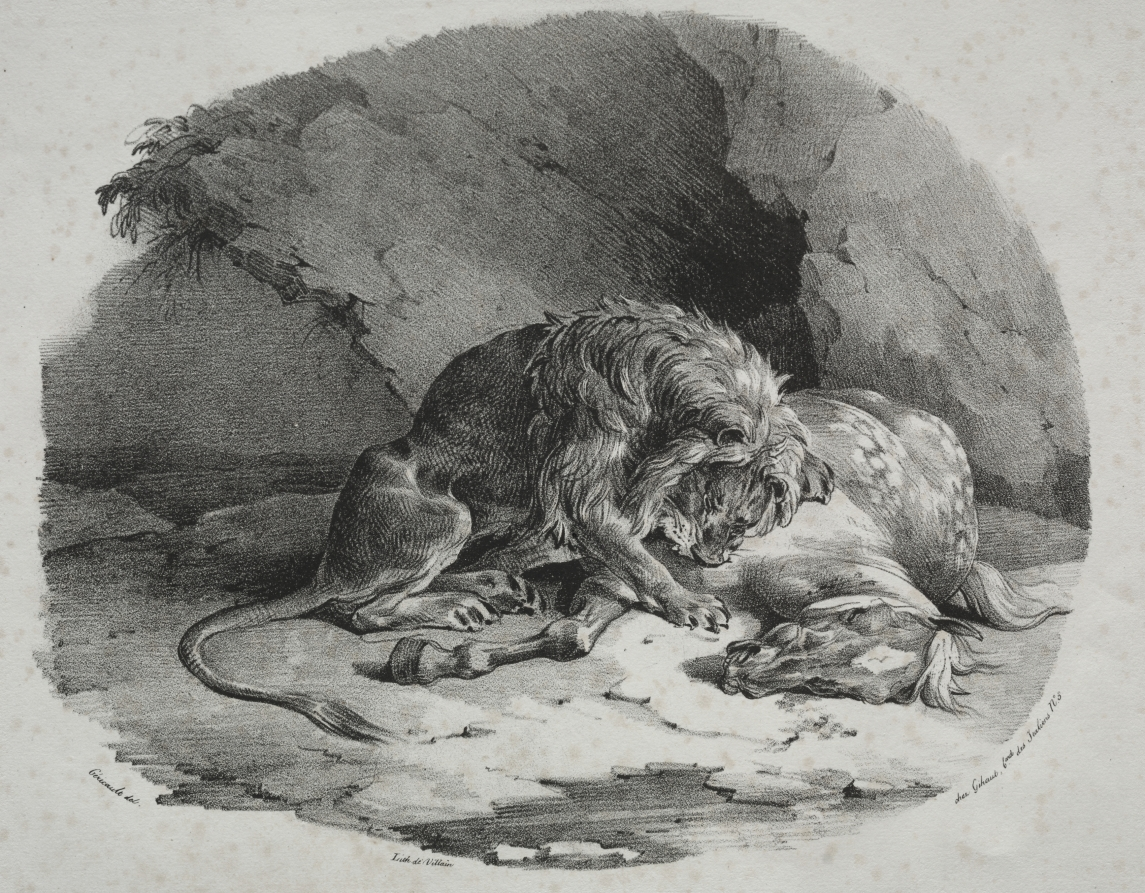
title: Horse Devoured by a Lion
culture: France, 19th century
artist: Théodore Géricault (French, 1791–1824)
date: 1823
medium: lithograph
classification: Print